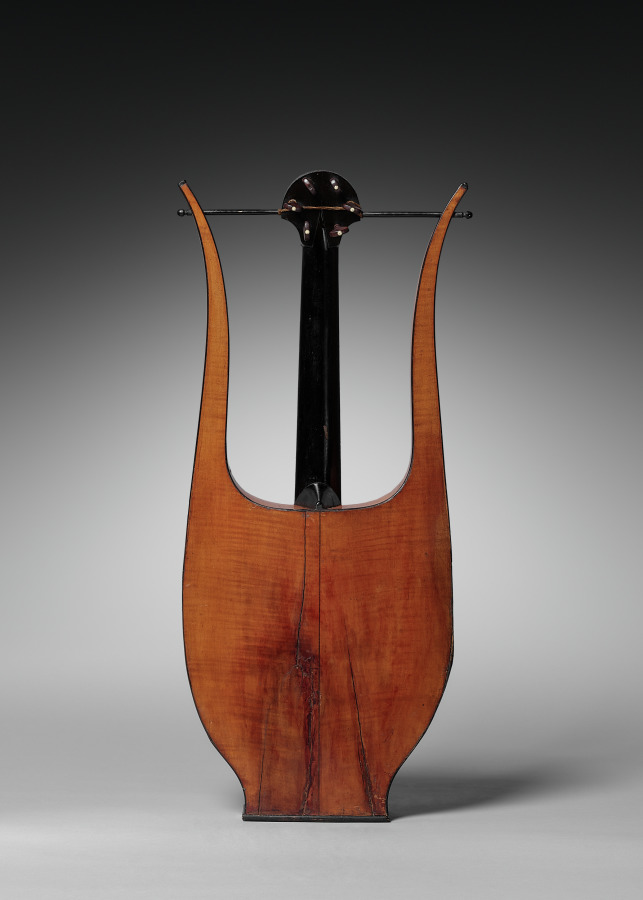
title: Lyre Guitar or Lirachitara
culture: France, 19th century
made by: M. C. Mousset (French)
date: c. 1800–1825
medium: varnished wood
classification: Musical Instrument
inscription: inscribed within sound box: "M. C. Mousset."